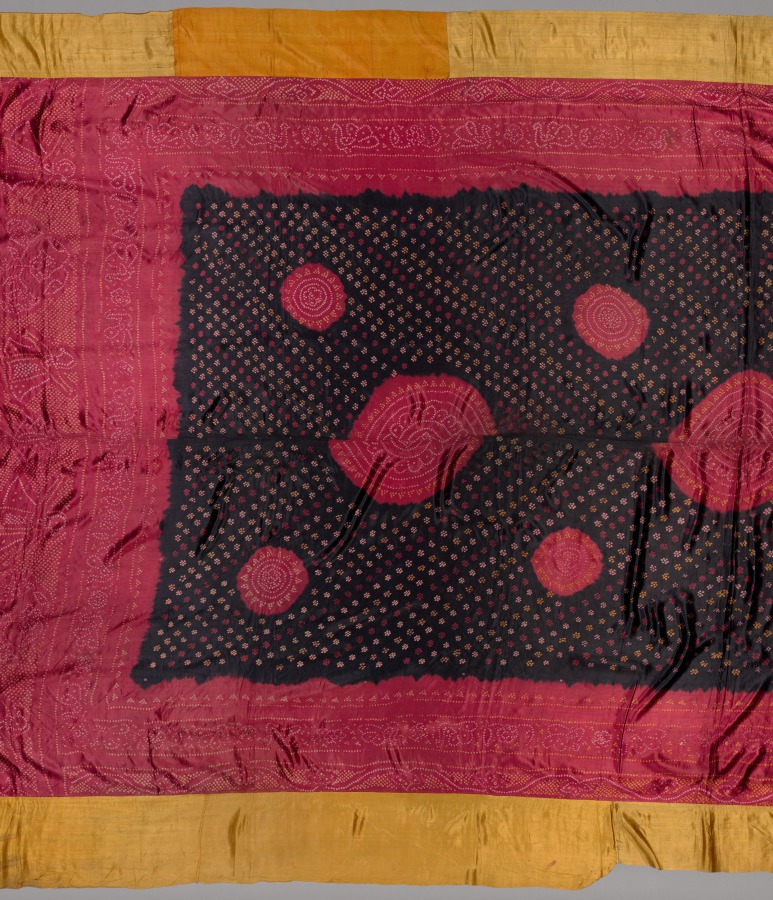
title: Indian Textile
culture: India, 19th - early 20th century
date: 1800s - early 1900s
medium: satin, tied and dyed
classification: Textile